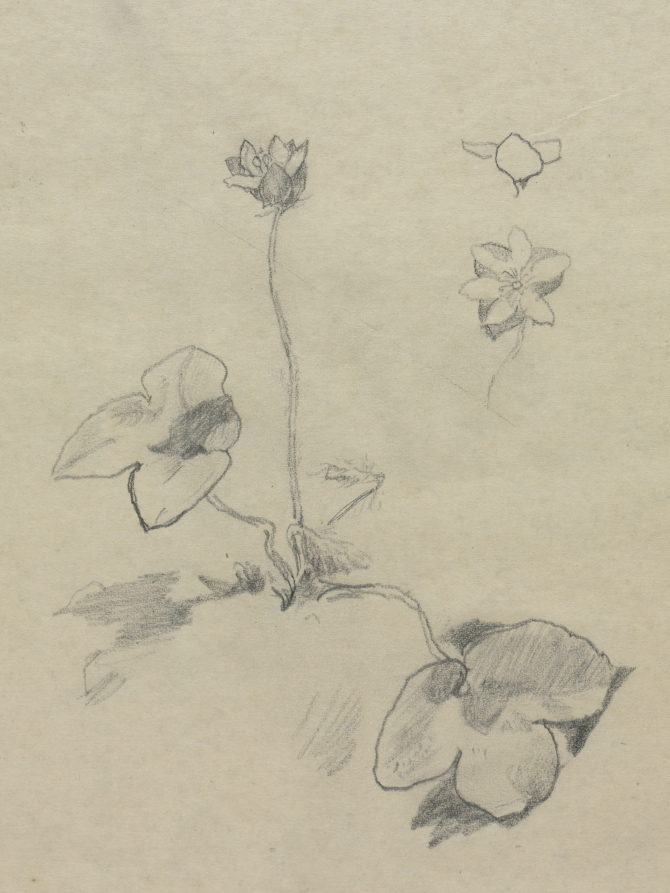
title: Anemone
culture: America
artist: John La Farge (American, 1835–1910)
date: c. 1850–1910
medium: pencil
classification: Drawing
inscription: Circular red stamp, surname of La Farge in Japanese characters